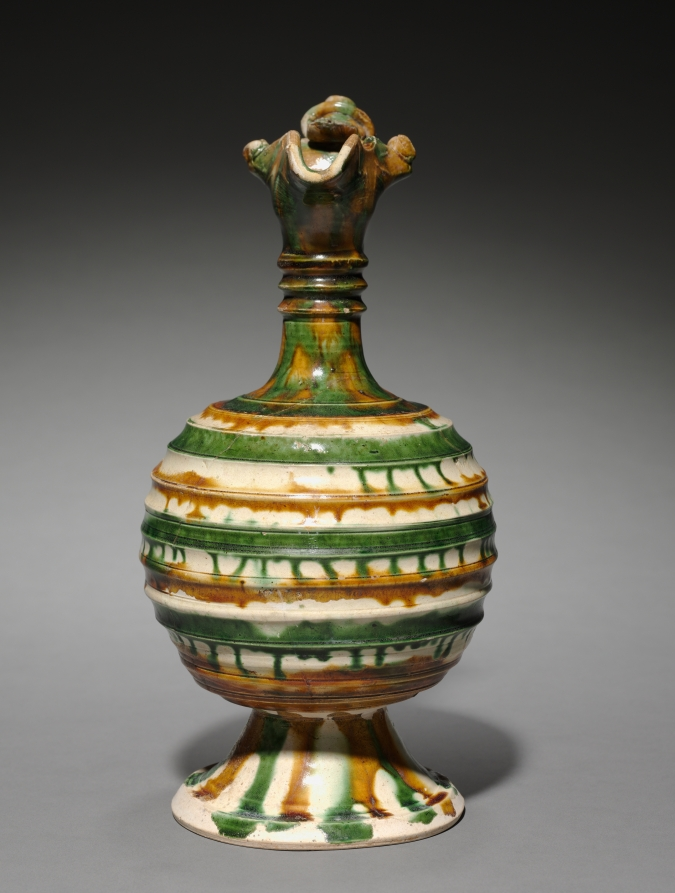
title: Ewer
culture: China, Tang dynasty (618-907)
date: 700–750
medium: glazed earthenware, sancai (three-color ware)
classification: Ceramic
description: Many sancai or "three-color" lead-glazed wares-such as this ewerare notable for their heavy dependence on metalwork prototypes. Such polychrome glazed wares were intended for the tomb.